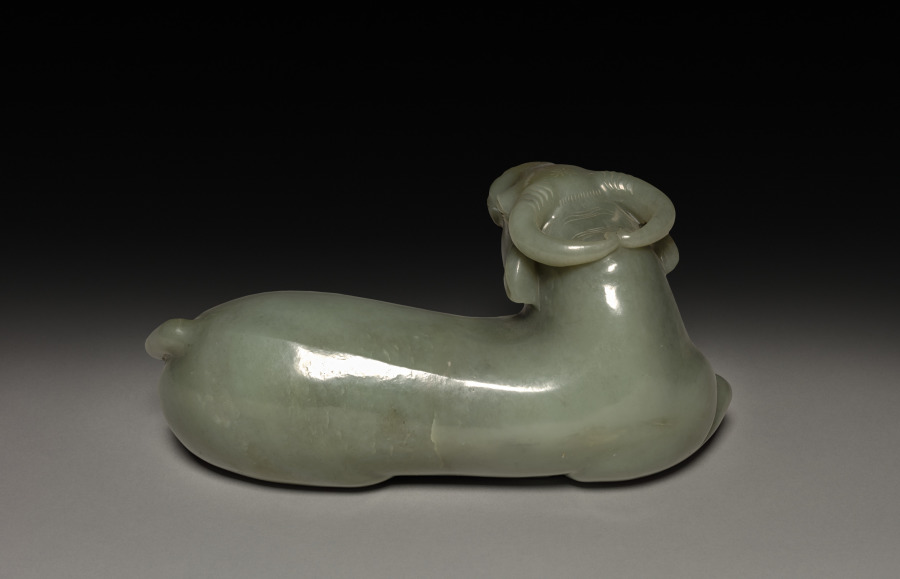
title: Reclining Water Buffalo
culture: China, Qing dynasty (1644-1911)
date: 1644–1911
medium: jade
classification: Jade